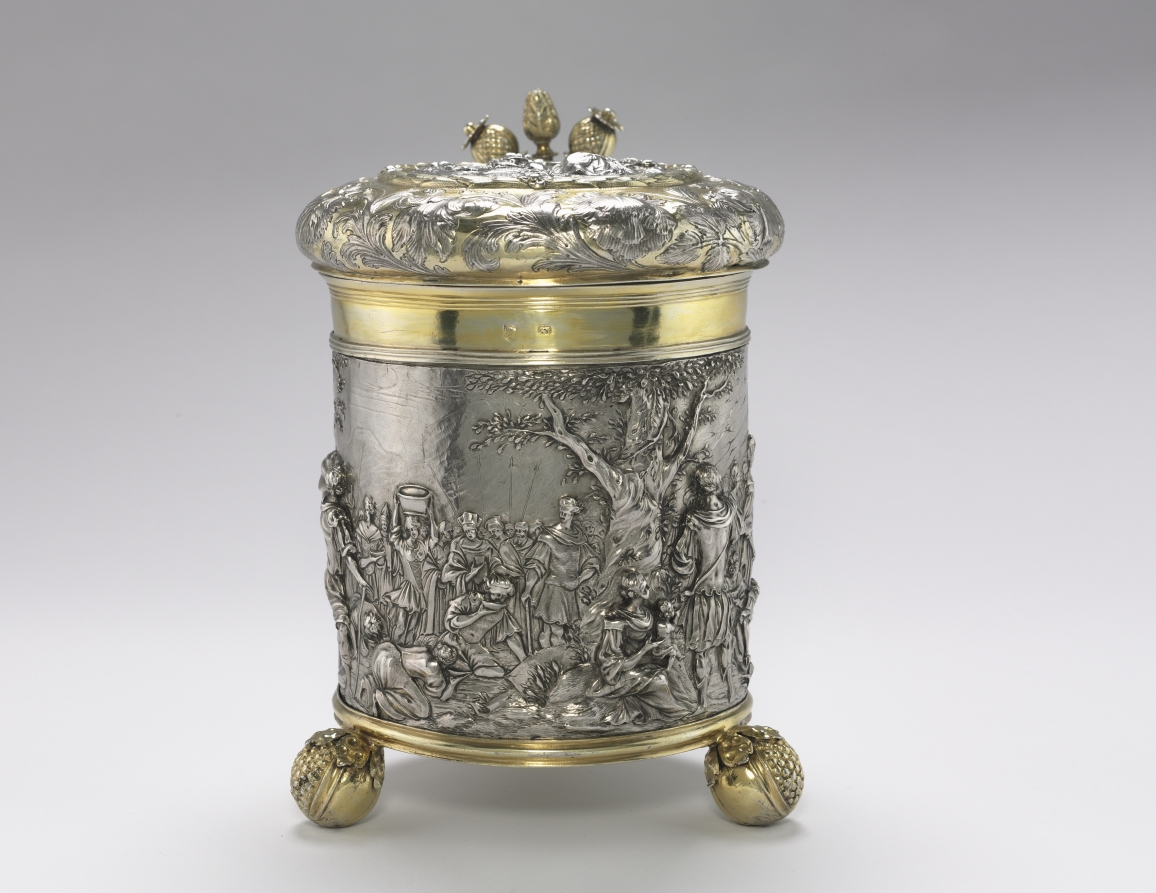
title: Tankard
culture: Germany, Augsburg, 17th century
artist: Andreas Brachfeldt (Russian, born Latvia, active 1661–1697)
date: c. 1680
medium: cut and seamed silver sheet, repoussé and chased ornament, cast handle and feet, partially gilded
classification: Metalwork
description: Tankards of this form were made toward the end of the 1600s in various port cities rimming the Baltic Sea. This example is enriched with a detailed scene of Moses striking the rock, executed in Augsburg, Germany, in about 1675–78.